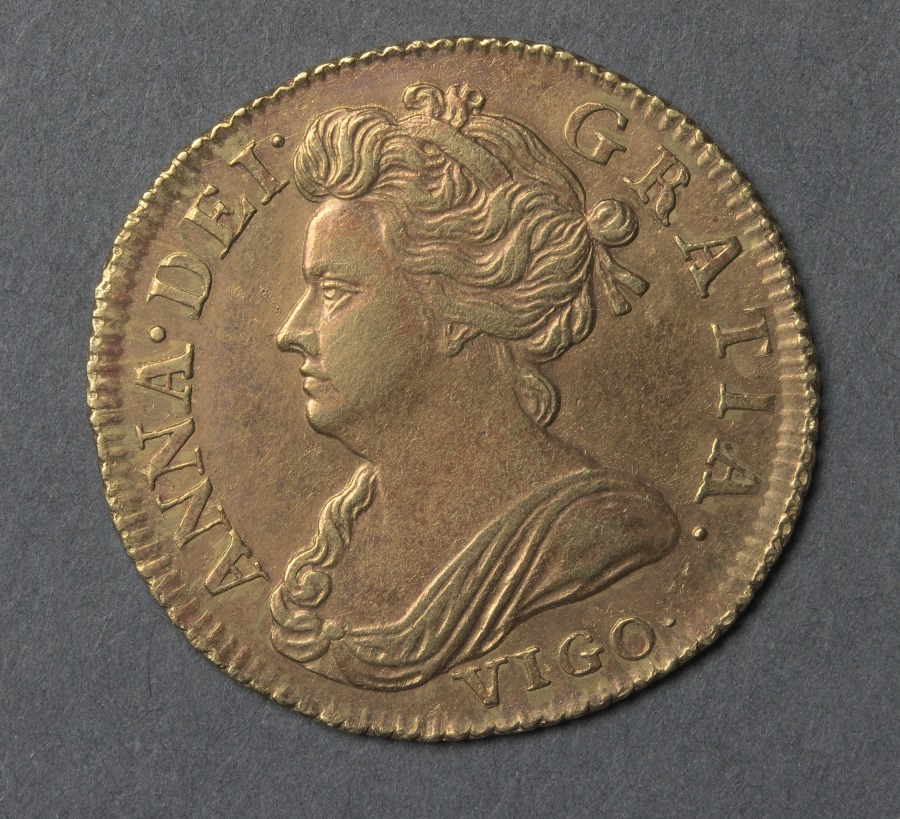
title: Half Guinea: Anne (obverse); Shields and Rose (reverse)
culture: England, Anne, 1702-1714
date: 1703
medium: gold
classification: Coins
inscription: ANNA.DEI. GRATIA VIGO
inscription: MAG BR. FRA ET. HIB REG 1703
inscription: DECUS ET TUTAMEN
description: The coinage of Anne's reign remained fairly constant after the inaugural design in 1662. Before the Act of Union with Scotland (1706), the arms of England and Scotland remained separate, as shown. After the act the two arms were conjoined on one shield. The word Vigo indicates the coins were struck from gold captured from the Spanish at the Battle of Vigo Bay (1702). Although silver coins bearing the Vigo inscription are less rare, the three gold denominations bearing the symbol are all extremely rare.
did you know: The Battle of Vigo Bay occurred on October 23, 1702. After the battle the treasure, largely of silver with a tiny amount of gold, was transported back to England and coins were made bearing the inscription Vigo.